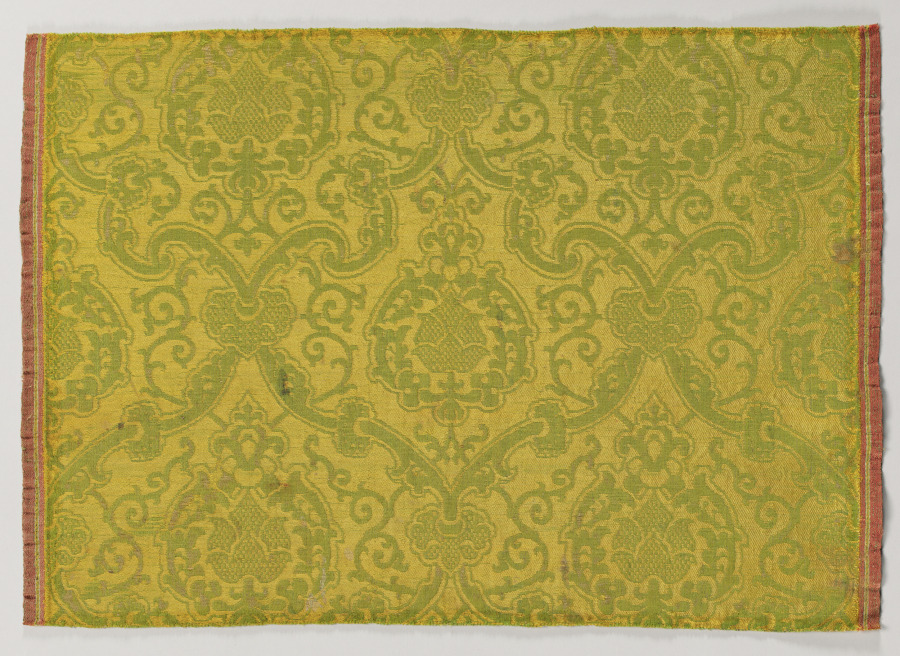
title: Length of Fabric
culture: Italy or Spain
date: 1500s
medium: brocade; silk and linen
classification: Textile